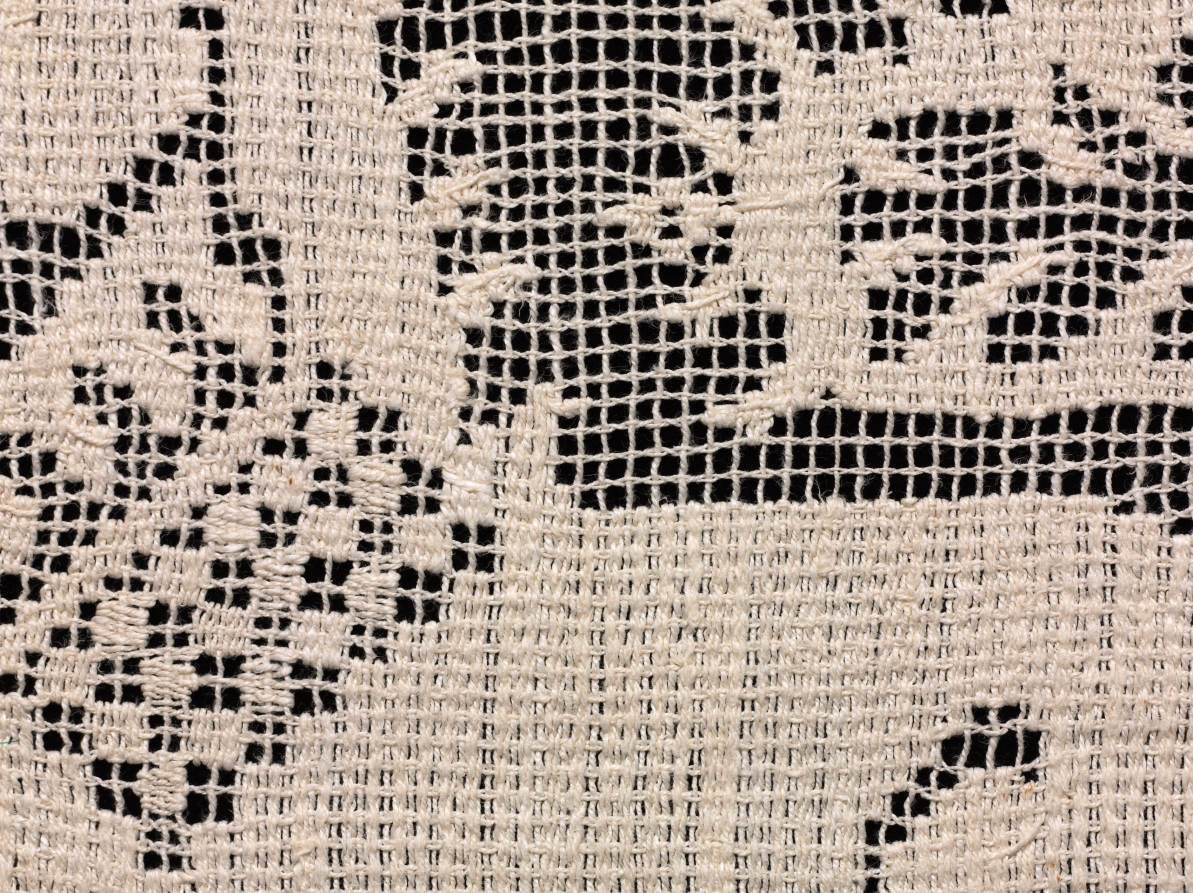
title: Fragment of a Band with Dragon, Castle, and Vegetation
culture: Italy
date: 1500s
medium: Bleached linen (est.): needle lace, burato (twined ground and darned in one direction)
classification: Lace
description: The detailed and elegant craftsmanship of this piece of lace clearly delineates the dragon, with its extended tongue, pointy scales along its neck and tail, and clawed feet. To its right is an architectural element, most likely a castle.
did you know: This piece has a counterpart at the Metropolitan Museum of Art, New York (20.186.359).